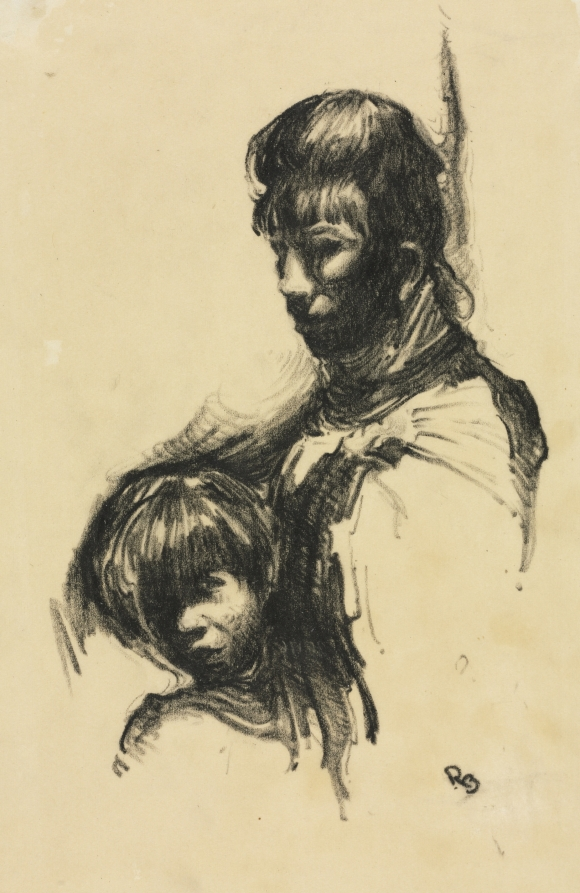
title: Mother and Child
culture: America, Ohio, Cleveland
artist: Richard Beatty (American, 1899–1961)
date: 1926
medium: lithographic crayon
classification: Drawing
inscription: In crayon, bottom right: "R.B."